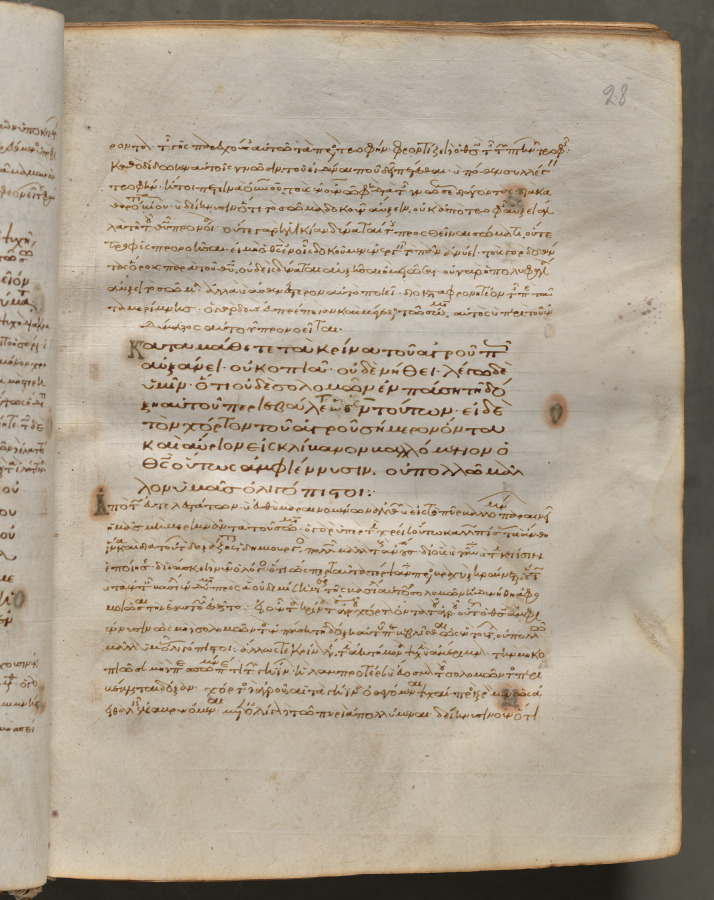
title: Text, folio 28 (recto), from a Gospel Book with Commentaries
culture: Byzantium, Constantinople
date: c. 1000–1100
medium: ink, tempera, and gold on vellum; leather binding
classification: Bound Volume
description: Each of the four gospels in this book opens on a page with brilliantly illuminated borders depicting the author of the text as well as birds—principally peacocks, symbols of the immortality of the soul—and fountains, representing the fountain of life and the salvation of the soul. This volume consists of 428 leaves with texts in Greek. Its level of sophistication suggests that it was probably written and decorated in a monastery in Constantinople.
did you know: Gospel books were carried in procession through Byzantine churches.